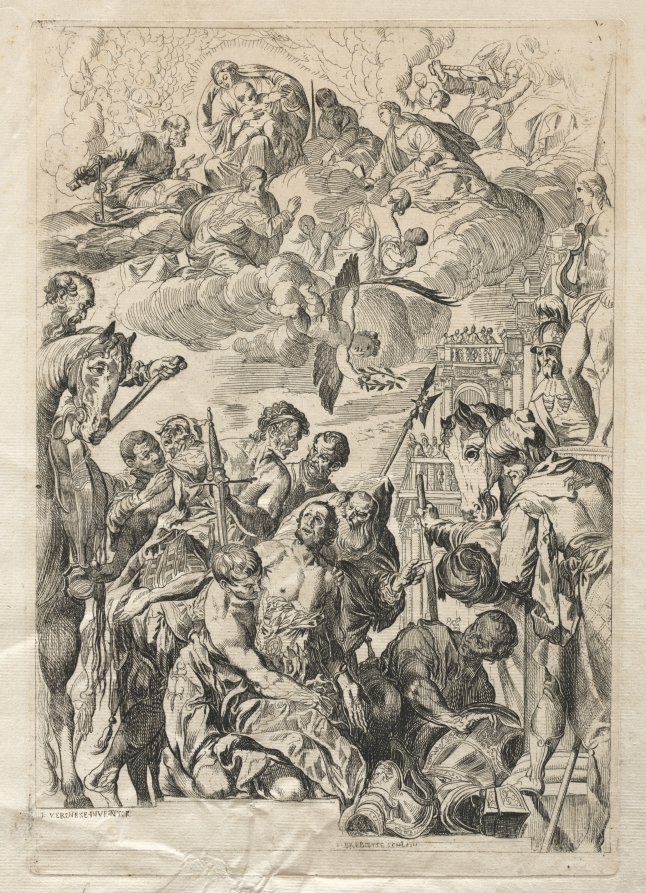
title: St. George Preparing for His Martyrdom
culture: France, 17th century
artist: Pierre Brébiette (French, c. 1598-c. 1650)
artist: after Paolo Veronese (Italian, 1528–1588)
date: 1600s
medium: engraving and etching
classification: Print